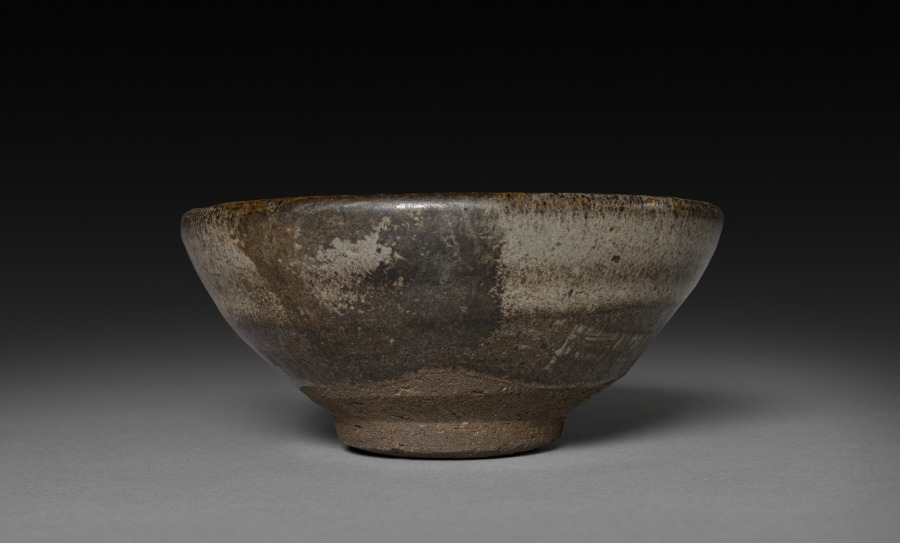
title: Tea Bowl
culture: China, Fujian province, Song dynasty (960-1279)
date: 960–1279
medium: stoneware, Jian ware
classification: Ceramic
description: This brownish-black stoneware tea bowl has rounded sides. Its mottled and blurred green-gray and brown glaze stop short of the foot.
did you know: Jian ware was very popular with the tea cultures in China and Japan.